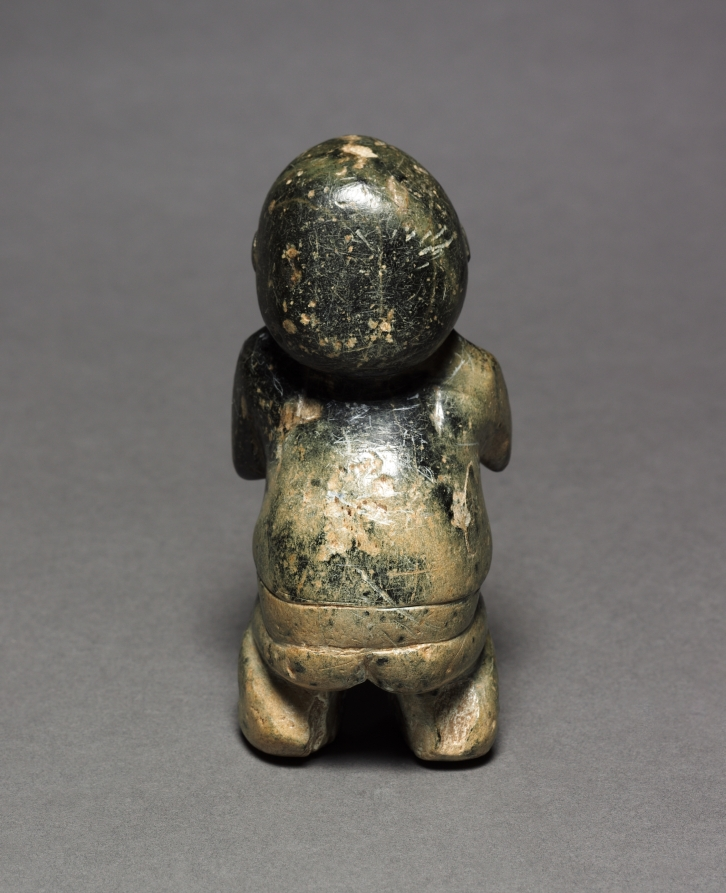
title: Crouching Figure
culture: Mexico, Guerrero, Olmec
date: 900–300 BCE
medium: serpentine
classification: Sculpture